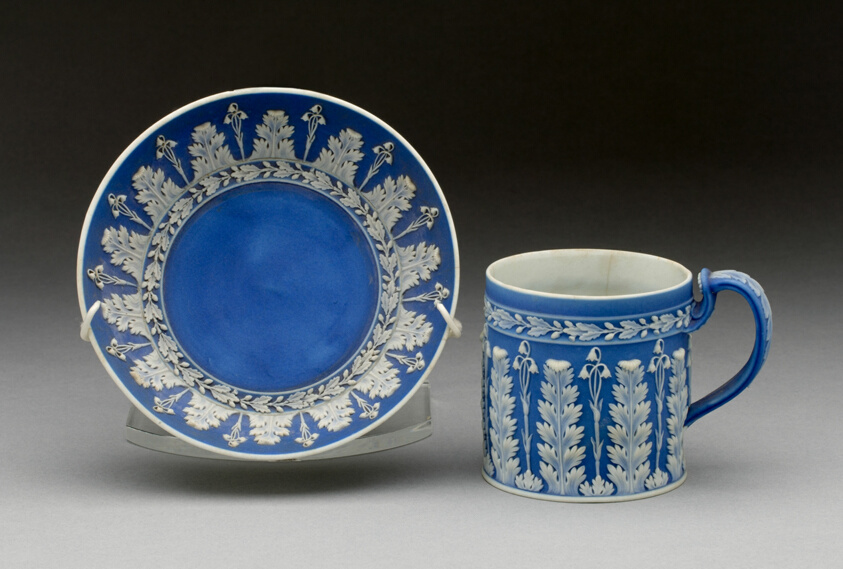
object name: Ceramics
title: Coffee Can and Saucer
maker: Wedgwood Manufactory (England, founded 1759)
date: c. 1790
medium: Stoneware (jasperware)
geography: Burslem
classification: teaware; stoneware; european decorative arts; ceramics